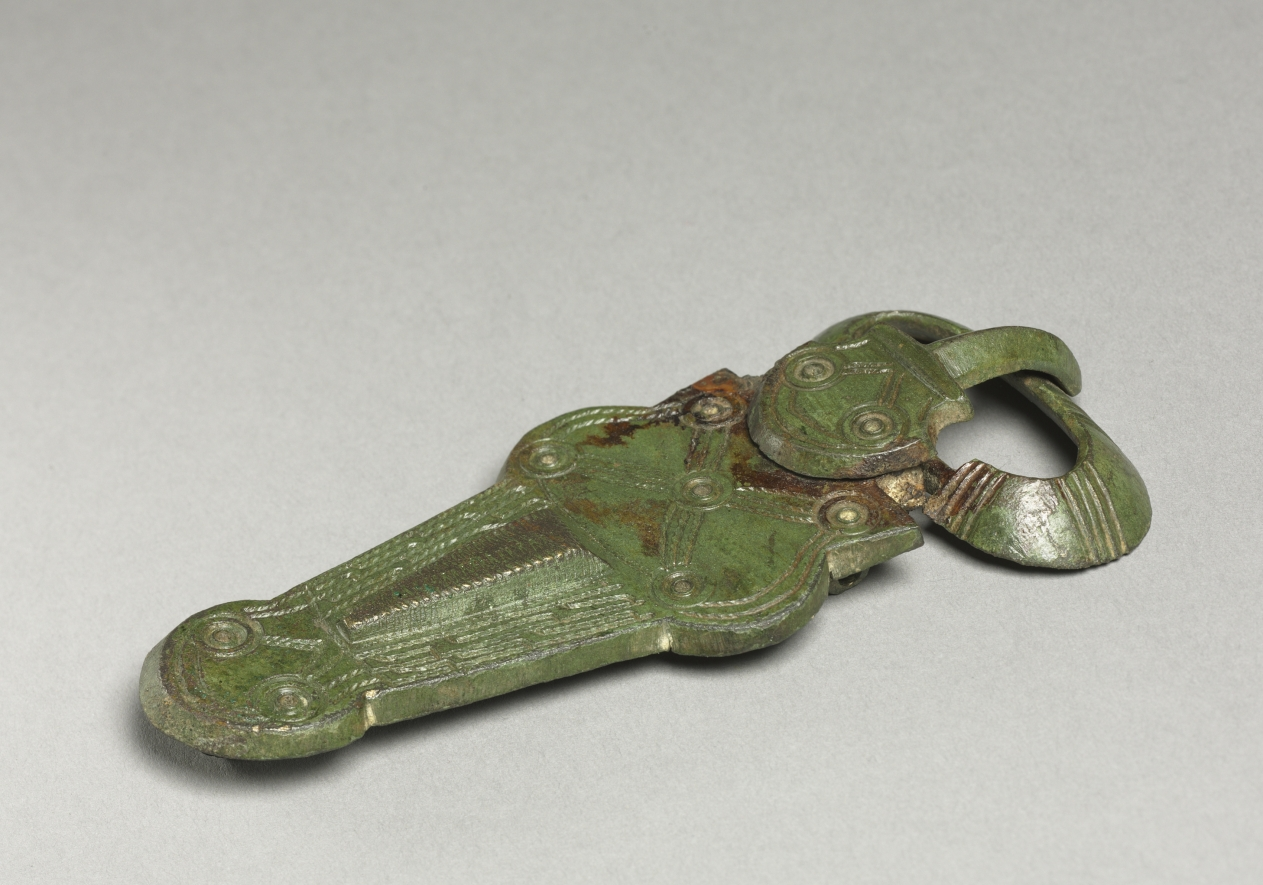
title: Buckle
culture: Frankish(?), Migration period, 6th century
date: 500s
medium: brass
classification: Jewelry